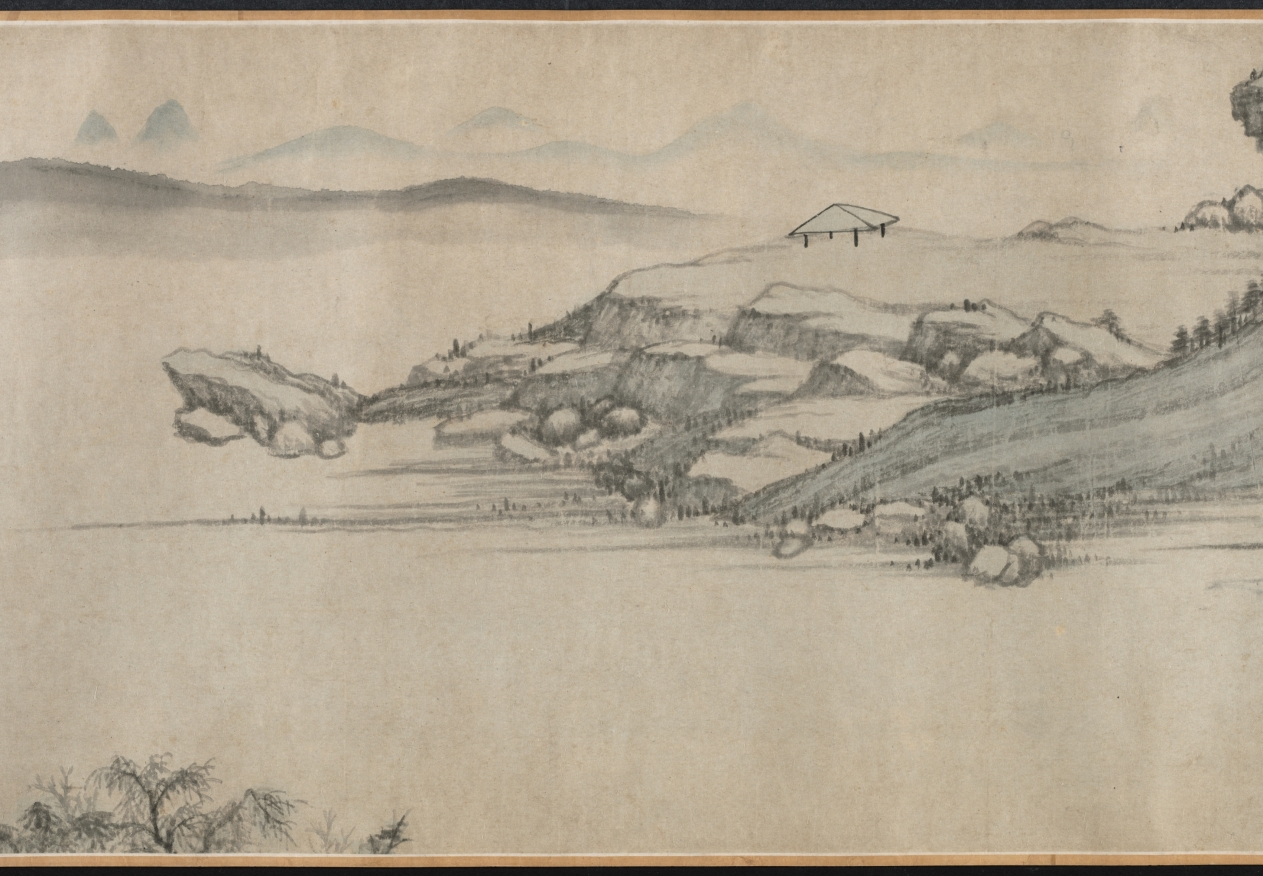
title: Mt. Taibo in the Style of Wang Meng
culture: China, Ming dynasty (1368–1644)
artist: Du Qiong (Chinese, 1396–1474)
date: 1442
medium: handscroll; ink and light color on paper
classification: Painting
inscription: Artist's inscription, signature, and 11 seals: [1 seal] Tung-yüan chai. Huang-ho-shan-ch'iao [Wang Meng] painted a painted called T'ai-po Mountain. Its brushwork is superior and admirable, which is very close to Yu-ch'en [Wang Wei, 699-759]. The cleverness of its composition, the maple groves and rustic temples, the inaccessible ravines and autumnal plateaus, the periolous peaks and strange rocks, etc., all seem to be so natural. The paper is only a little over eight feet, but the landscape has the range of a thousand miles. Once you open and note the contents, it is as if one were roaming among the mountain peaks enveloped in mist and clouds, and forgot the dusty world. When I first saw this, I was so mixed with excitement and joy that I could not take my hands off the painting. So I put it on the table, and tried my best to imitate it, forgetting sleeping and eating for about three months before it was completed. Although I do not dare to tread in the footsteps of Huang-ho shan ch'iao, I took great pains to capture his spirit in composition and colors. I do not know whether it would pass the judgment of the experts. On the fifteenth day of the fifth month, the seventh year of the Cheng-t'ung year [1442], inscribed by Tung-yüan, Tu Chiung. [2 seals] Yung-chia; Ching-chieh ming-men. [8 seals on painting] Tung-yüan chai; Ching-chieh ming-men; Yung-chia; Tu Ch'iung yin; Tung-yüan (repeated 5 times). trans. WKH/LYSL 3 colophons and 7 additional seals: 1 colophon and 2 seals of Chou Ting (1401-1487); 1 colophon and 2 seals of Wu K'uan (1435-1504); 1 colophon, dated 1655, and 2 seals of Lan Ying (1585-after 1664).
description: When a Chinese painter "imitated" a painting by a past master, the intention was never to produce an exact copy. Du Qiong, the Ming painter from Suzhou, is a case in point. The painting style of this handscroll is actually closer to that of Huang Gongwang (1269–1354) than to the style of Wang Meng (about 1301–1385). Both masters were active during the previous dynasty and are among the so-called Four Great Masters of the Yuan dynasty (1279–1368). In this painting, the interplay of styles, including Du Qiong's own, contribute to an inner dimension that is more than visual. Mt. Taibo is located in the province of Zhejiang and is known for its scenic beauty. In this scroll, however, it is not depicted literally. The image is an ideal representation of mountains in southeastern China.